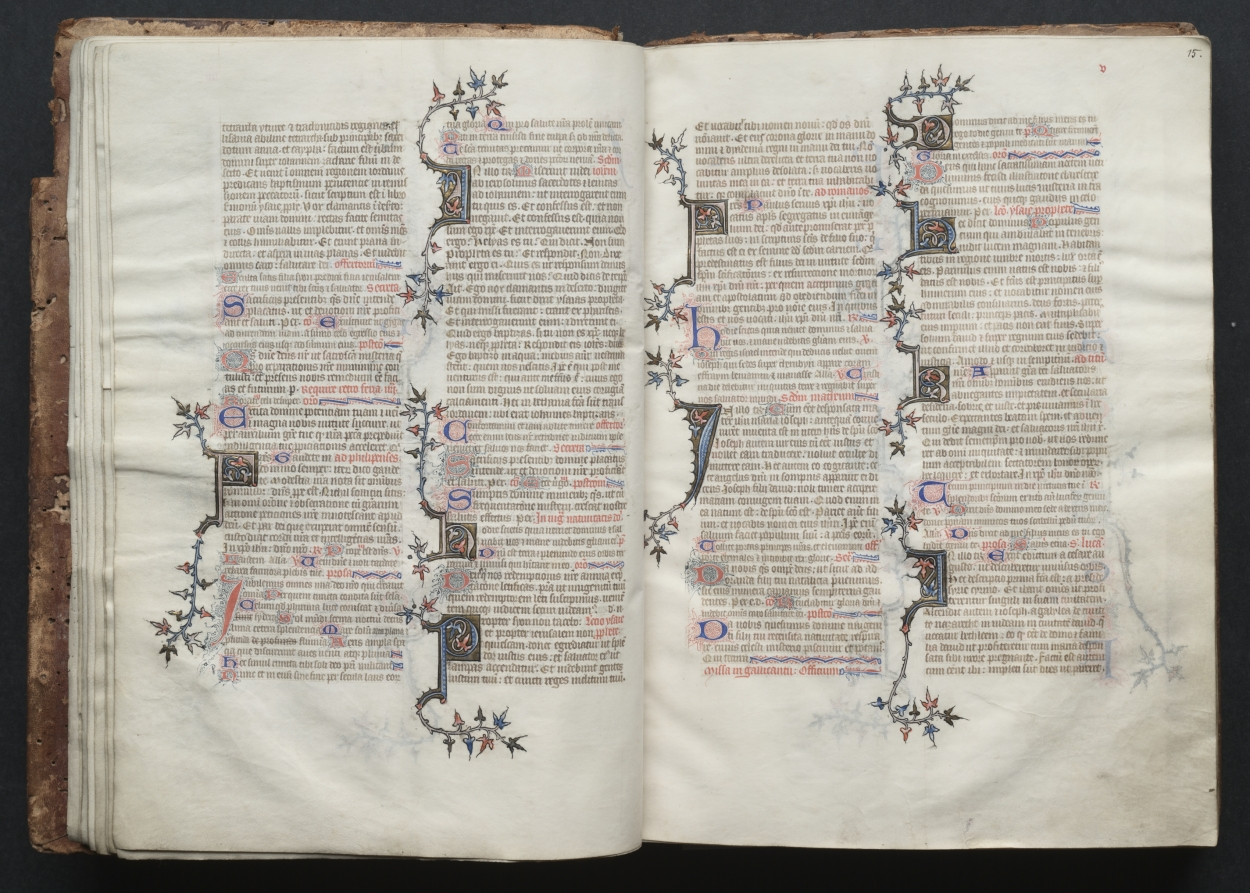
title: The Gotha Missal: Fol. 14v, Text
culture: France, Paris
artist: Master of the Boqueteaux (French)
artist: and Workshop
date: c. 1375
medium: ink, tempera, and gold on vellum; blind-tooled leather binding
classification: Bound Volume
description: The style and quality of this manuscript's decoration is typical of deluxe Parisian books made for aristocratic or royal patrons. Most of the book's decoration appears to be the work of the Master of the Boqueteaux, an artist active at the court of King Charles V (died 1380). His style was apparently shared by a number of book illuminators working in and around Paris. It is very possible that the Gotha Missal belonged to Charles V, but is not provable because the manuscript has no royal portraits and lacks a colophon. Given the book's magnificent decoration, however, it would seem that it was produced for a Valois prince, if not for the king himself. The manuscript receives its name from the German dukes of Gotha, its later owners.